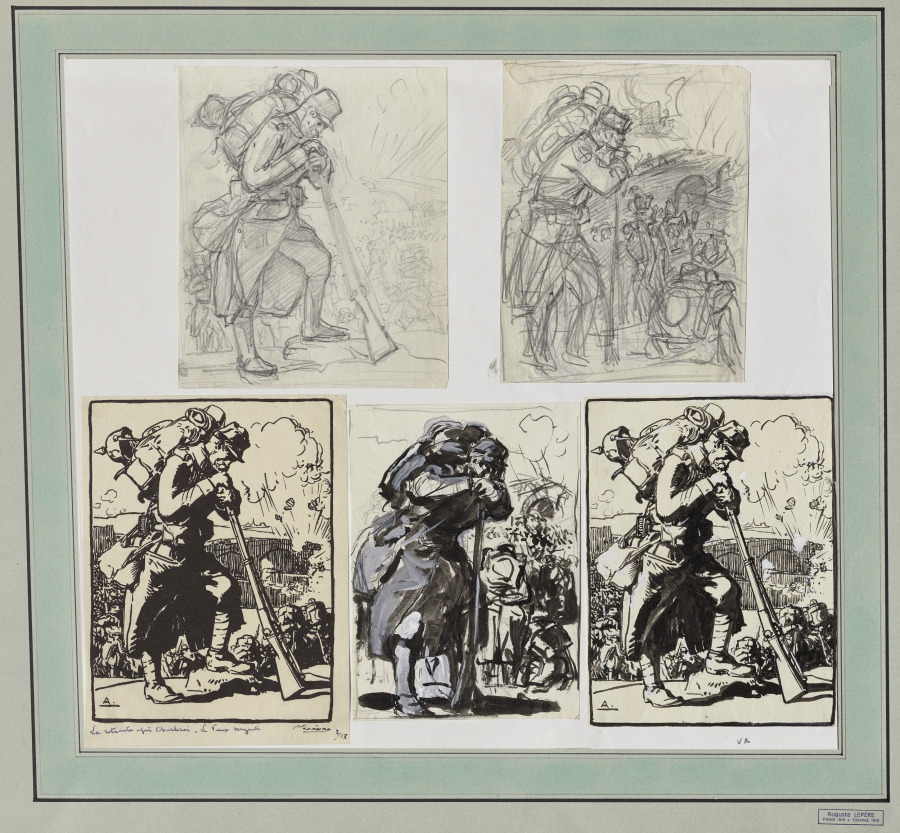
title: La Retraite après Charleroi...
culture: France, 20th century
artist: Auguste Louis Lepère (French, 1849–1918)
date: 1914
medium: pencil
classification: Drawing